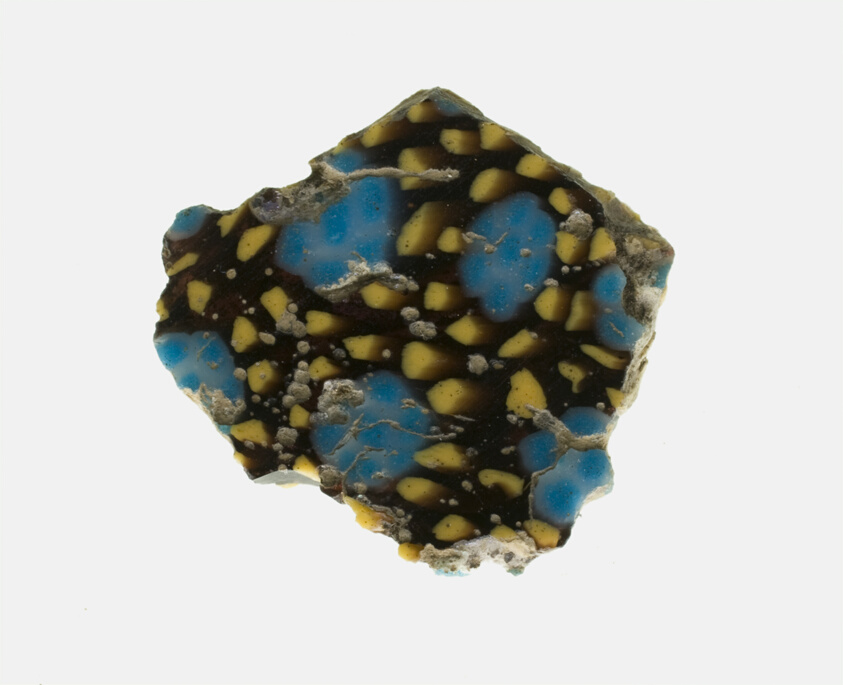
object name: Decorative Arts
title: Fragment of a Plate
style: roman (ancient, style or period), ancient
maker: Roman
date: 1st century BCE–1st century CE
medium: Glass, mosaic glass technique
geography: Roman Empire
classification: fragment; decorative arts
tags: decoration